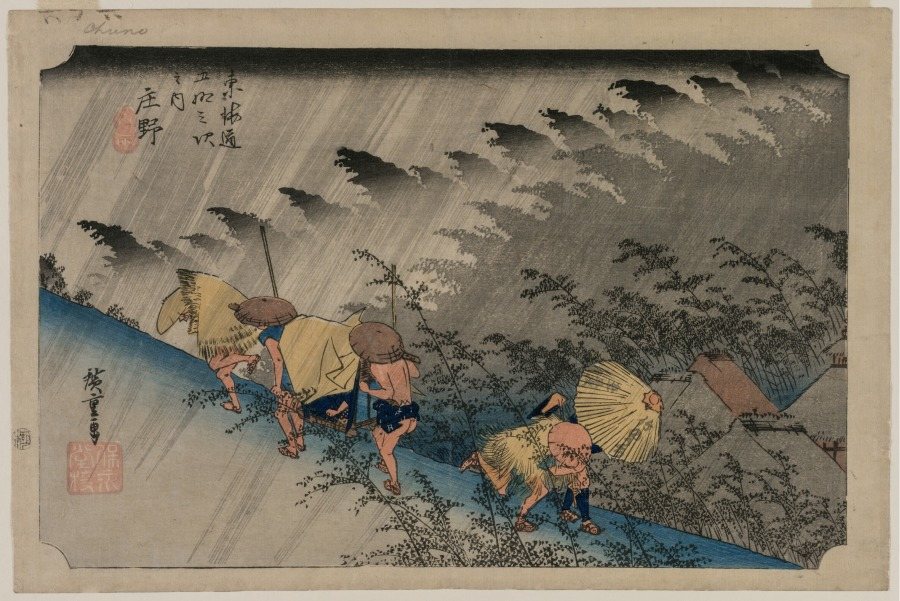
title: Driving Rain at Shōno, from Fifty-Three Stations of the Tokaidō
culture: Japan, Edo period (1615–1868)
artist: Utagawa Hiroshige (Japanese, 1797–1858)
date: 1833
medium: color woodblock print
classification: Print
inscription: Signature: Hiroshige ga. Publisher: Takenouchi Magohachi (Hoeido han). Seal: kiwame.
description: Utagawa Hiroshige’s design for this print captures the atmospheric qualities of rain and its effects on two groups of travelers. Three printing blocks were required to produce the three shades of gray used to suggest distance in the thickets of bamboo in the background. The publisher’s name, “Takenouchi,” and part of the series title, Fifty-Three Stations, are written on one person’s umbrella. Hiroshige created many different print series on the Tokaidō, a road that ran from Kyoto to Edo (now Tokyo). Shōno was a minor way station along this largely coastal route.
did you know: A large red seal with the publisher’s name, Takenouchi, is stamped on the left side of the print.